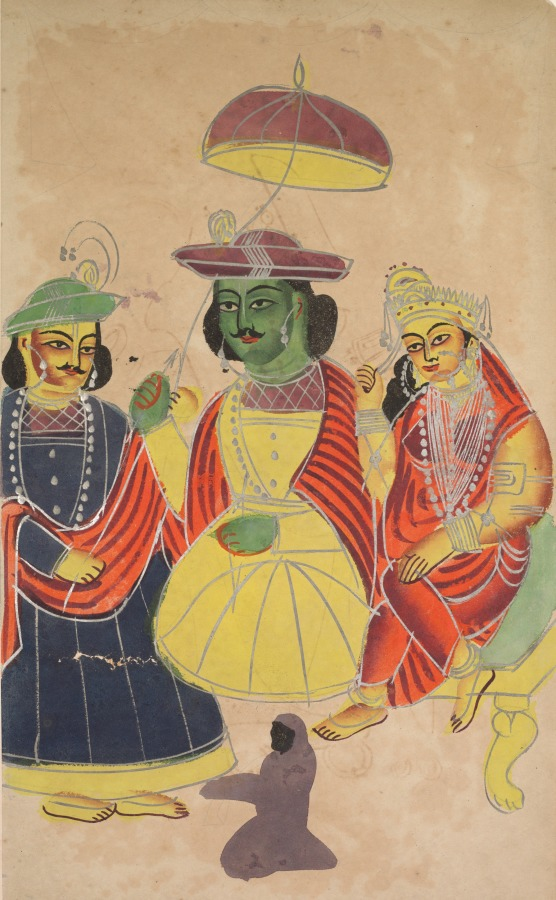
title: Rama and Sita enthroned with Lakshmana and Hanuman attending, from a Kalighat album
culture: Eastern India, Bengal, Kolkata, Kalighat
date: c. 1890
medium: Gum tempera, graphite, tin, and ink on paper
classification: Painting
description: Rama and Sita sit enthroned under a royal parasol held by Rama’s brother Lakshmana. A diminutive Hanuman kneels before them in adoration. The stunning mix of vibrant color animates the otherwise static scene. The local Indian artists who created inexpensive paintings for visitors to the temple at Kalighat were accustomed to creating rapid watercolor paintings with collapsed perspectives and flat backgrounds. Since their workshops were near the British colonial capital of Calcutta (now Kolkata), they were aware of British fashions, such as the Prince Albert mustache.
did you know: Rama wields the divine bow of Vishnu, which is why he is shown with an arrow in his right hand.